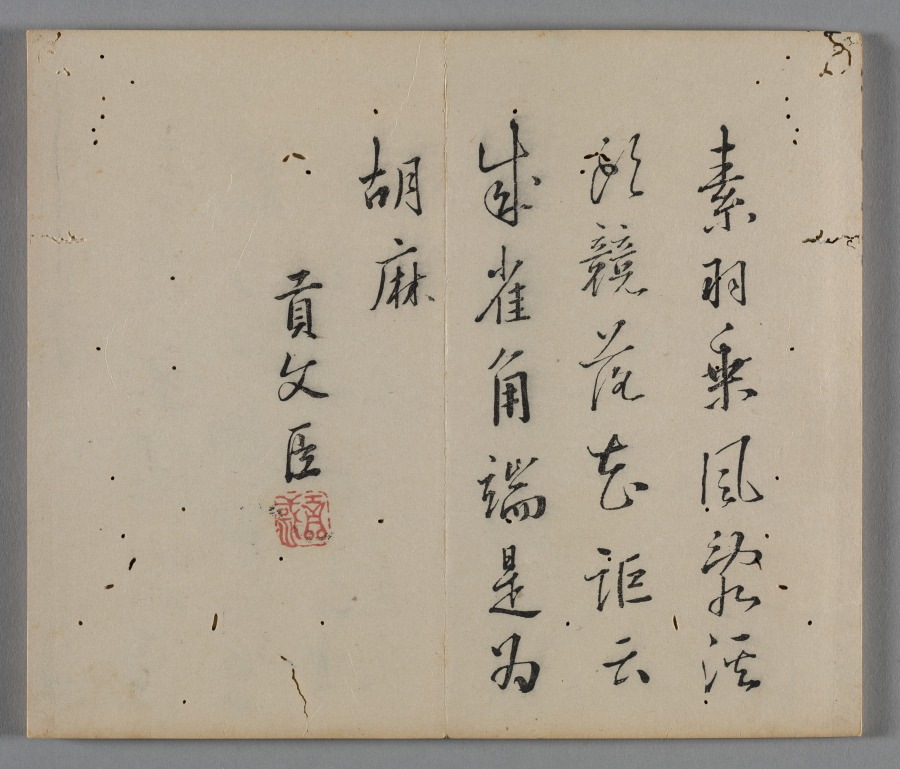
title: Ten Bamboo Studio Painting and Calligraphy Handbook (Shizhuzhai shuhua pu): Birds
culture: China, Qing dynasty (1644-1911)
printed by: Hu Zhengyan (Chinese, c. 1584–1674)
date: 1633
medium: Woodblock-printed book; ink and colors on paper; first edition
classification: Print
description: Color printing reached a level of perfection in the early 1600s, as seen in this Ten Bamboo Studio Collection of Calligraphy and Painting and the Mustard Seed Garden Manual of Painting (printed 1679 and 1701). The painterly quality, precision in registering (aligning) the woodblocks, and harmonious colors made them the most successful color print editions in Chinese history. Both editions were printed and compiled in Nanjing, spread nationwide, and had a great impact on the arts in Japan and Korea.